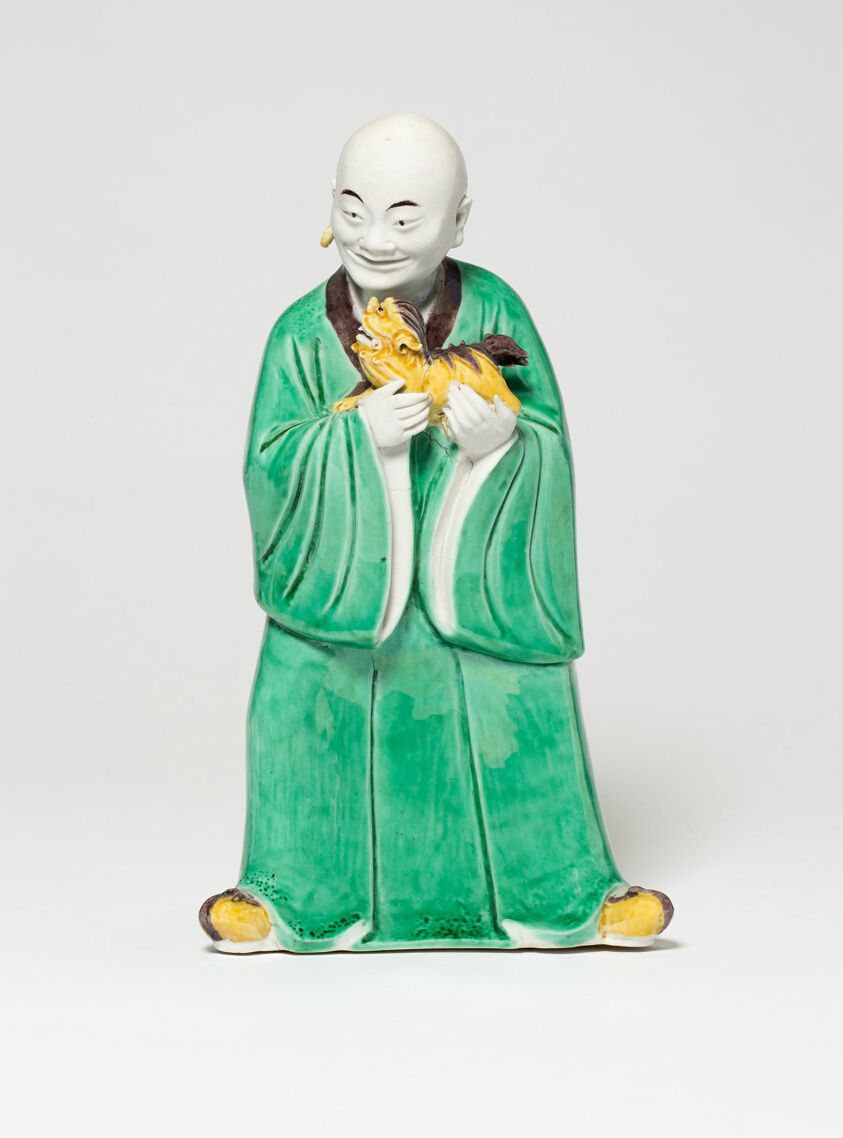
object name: Sculpture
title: Seated Luohan Holding a Lion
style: Chinese (culture or style)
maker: China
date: Qing dynasty (1644–1911), c. 19th century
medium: Porcelain painted in green, yellow, and aubergine glazes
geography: China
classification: porcelain; asian art; ceramics; sculpture